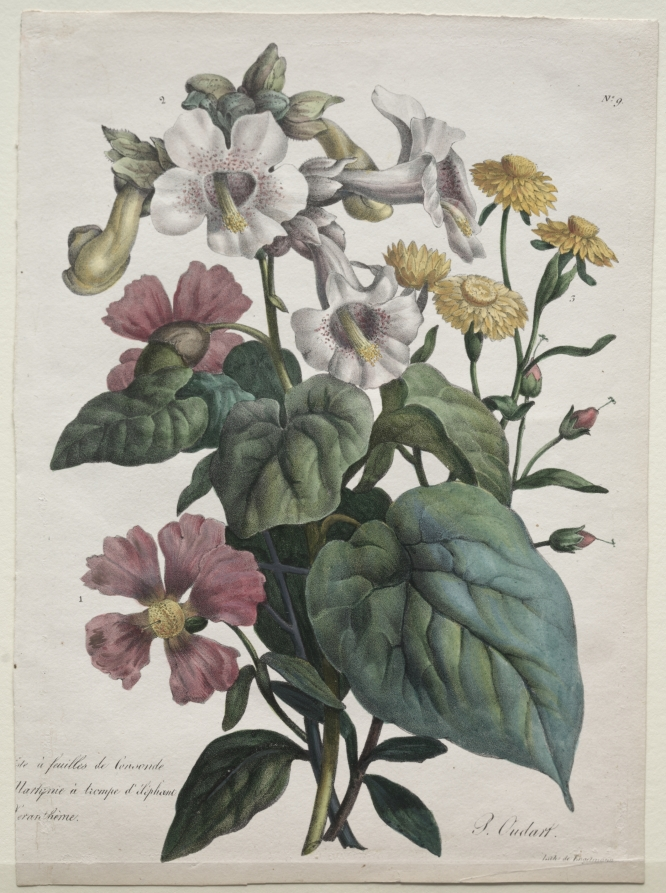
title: Cours d'Histoire Naturelle, contenant les principales espèces du règne animal, classées methodiquemenet: Martynia or Unicorn Plant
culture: France, 19th century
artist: Godefroy Engelmann (French, 1788–1839)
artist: after Paul Oudart (French, 1796–1860)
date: 1825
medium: lithograph, hand colored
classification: Print